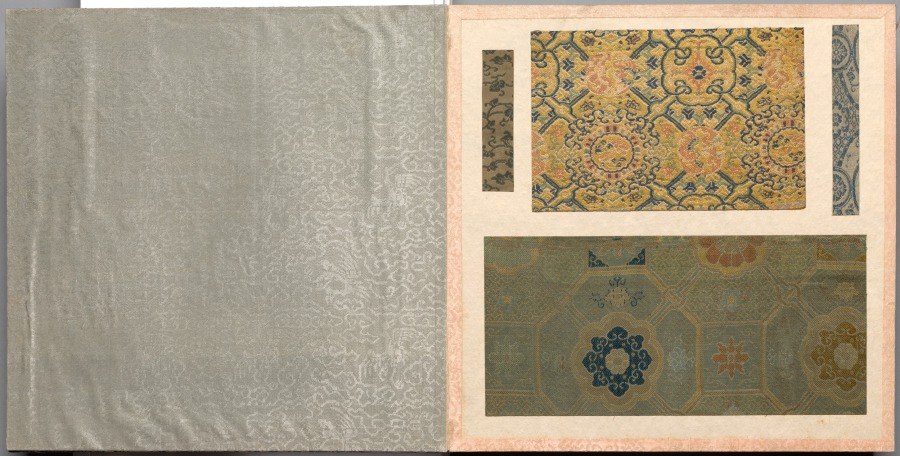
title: Album of Textile Samples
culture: Japan and China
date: 1700s–1800s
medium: silk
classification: Textile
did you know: This album contains 46 pages with 156 mounted Chinese or Japanese textile samples.